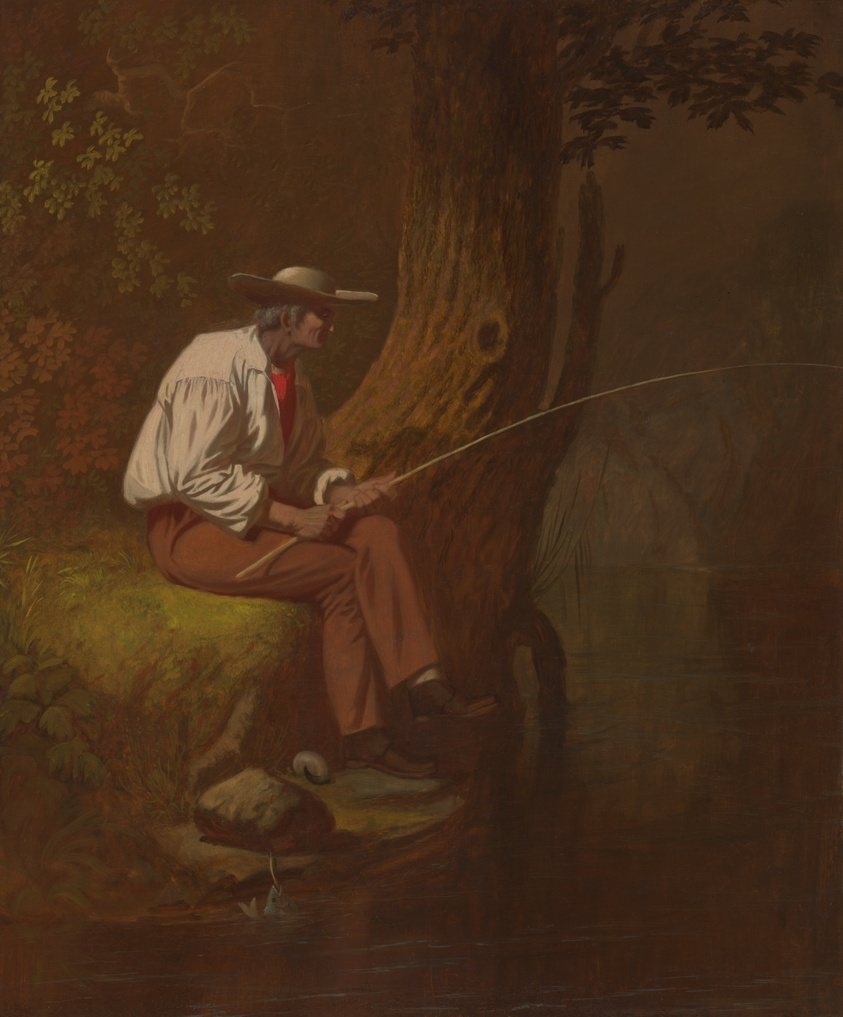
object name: Painting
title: Mississippi Fisherman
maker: George Caleb Bingham (American, 1811–1879)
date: c. 1850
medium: Oil on canvas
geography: United States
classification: american arts; painting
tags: fishing, American life, American South, fisherman, leisure, Mississippi, Mississippi Valley, rural life, boatman, Missouri, American West, genre, genre painting